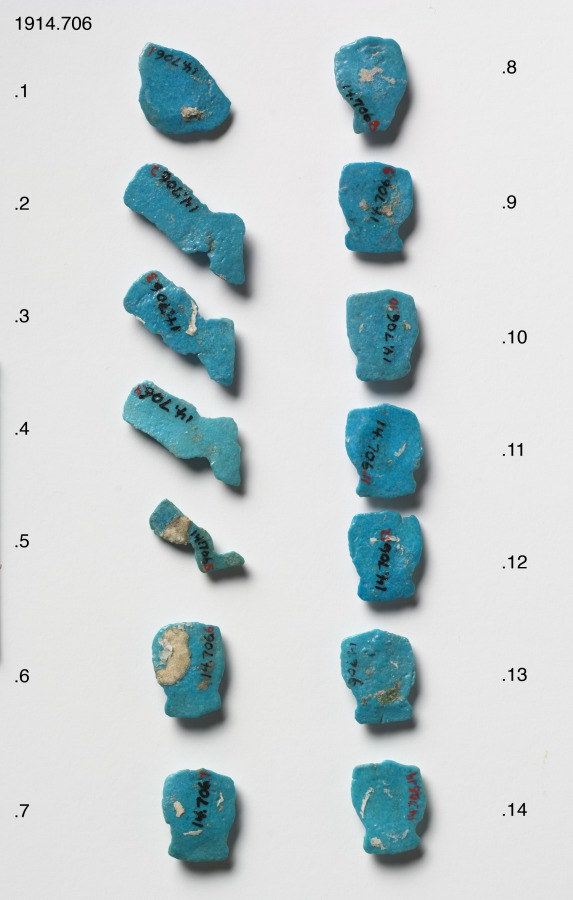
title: Food Model Amulets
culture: Egypt, New Kingdom (1540–1069 BCE), Dynasties 19–20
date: 1295–1069 BCE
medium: turquoise faience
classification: Amulets